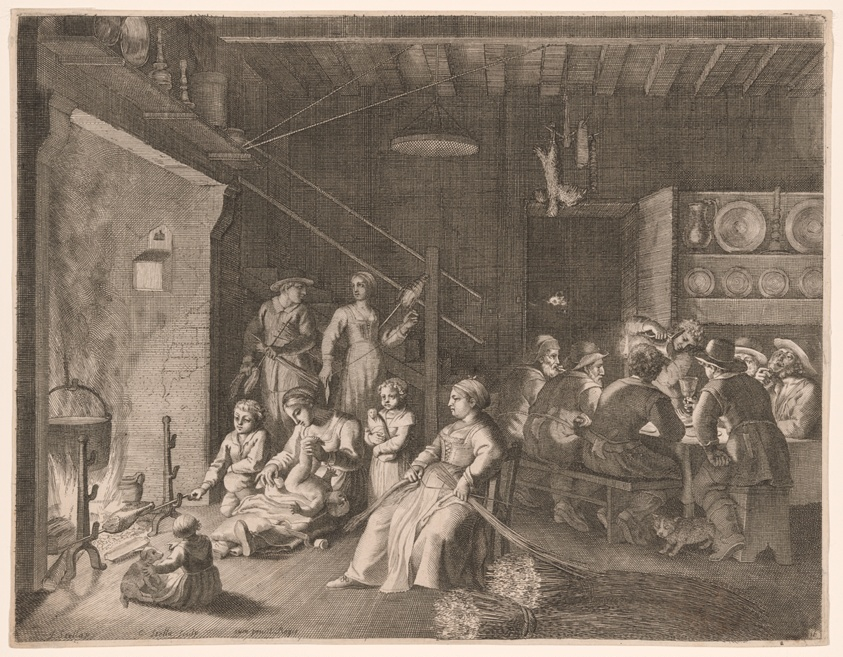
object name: Print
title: The Vigil at the Farm During Winter, Plate 16 from Pastorales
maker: Claudine Bouzonnet-Stella (French, 1636–1697); after Jacques Stella (French, 1596-1657)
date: 1667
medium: Etching in black on cream laid paper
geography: France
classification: prints and drawing; paper; etching; print